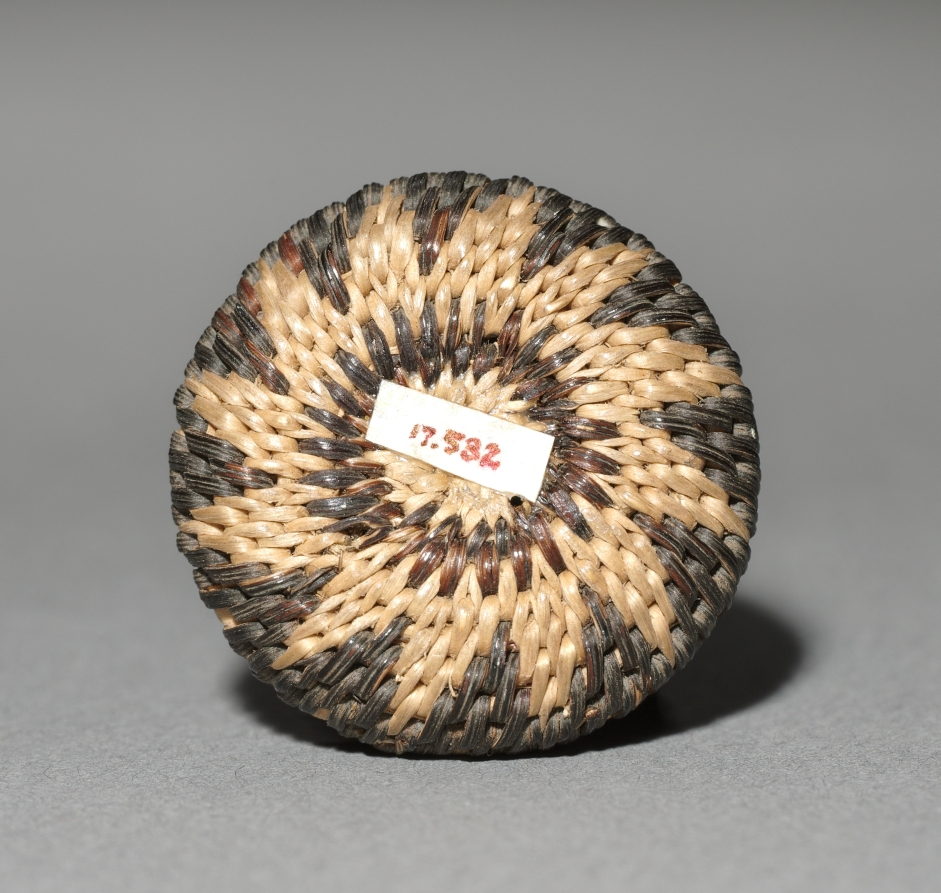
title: Miniature Round Basket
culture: California, Pomo, late 19th-early 20th century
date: late 1800s-early 1900s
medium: plant materials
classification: Basketry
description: Miniature baskets were made to demonstrate the basket-maker’s virtuoso skill, and these tiny marvels seem to be no exception—the smallest are only five millimeters wide but still patterned. For such fine work, dexterity was required as much for preparation of materials as for weaving.